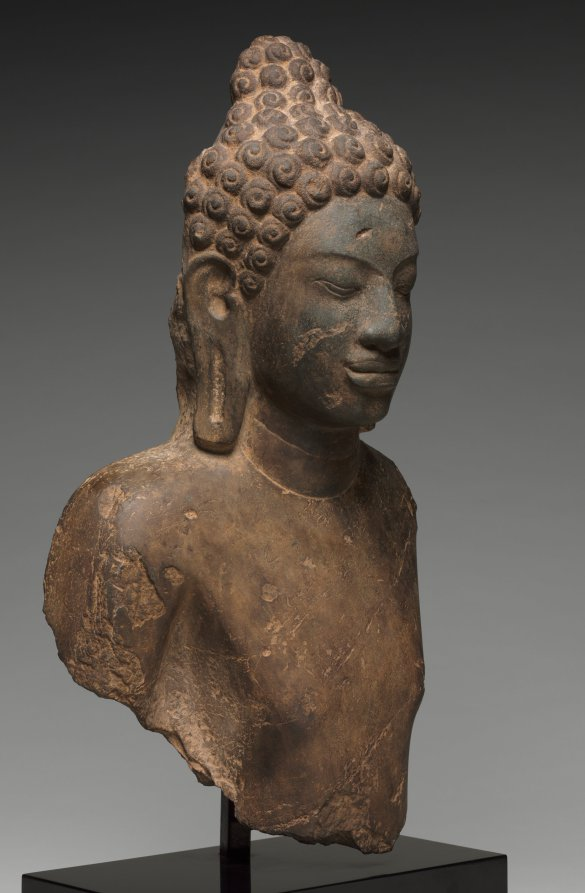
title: Bust of Buddha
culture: Central Thailand, Dvaravati, Mon-Dvaravati style, 7th-9th Century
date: c. 700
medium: limestone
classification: Sculpture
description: While the iconographic elements, such as elongated earlobes, cranial protuberance, and snail-shell curls derived from India, the local Mon people of Thailand gave their unique expression to the facial features of the Buddha. The beauty of sharply delineated eyes and stylized curling full lips was appreciated among the Mon, and these features impart an almost piercing serenity that is distinctive to Thai images from this early period of sculptural production in Southeast Asia.